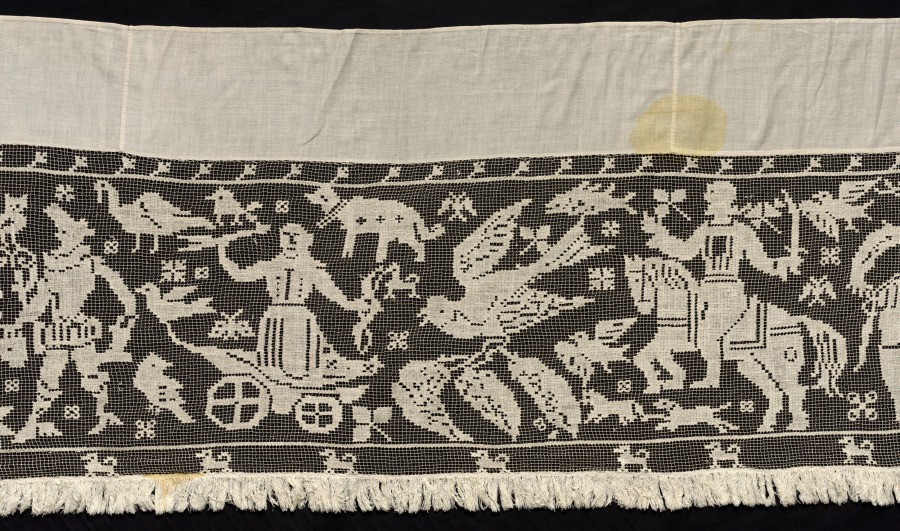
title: Border with Mounted and Standing Figures, Chariots, and Animals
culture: Spain ?, 1800s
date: 1800s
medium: Bleached linen (est.): needle lace, filet/lacis (knotted ground and darned in two directions)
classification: Lace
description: Animals viewed in profile, some with their legs raised, indicate movement, such as a parade or procession. The human figures are also shown in profile, with the exception of the central figure riding a chariot, who is shown frontally. There is one figure riding a donkey, with another on horseback, holding a sword. On the far right, a man and woman appear engaged in conversation. Meanwhile, various animals fill the space defying all rules of perspective, with the bird in the center appearing larger than some of the humans.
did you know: The word lace derives from the Latin laqueus, meaning noose.